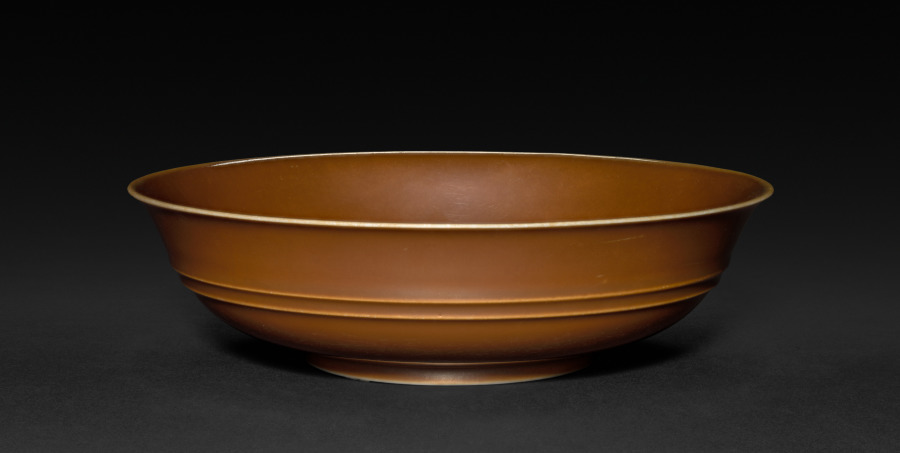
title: Dish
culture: China, Jiangxi province, Jingdezhen kilns, Qing dynasty (1644-1911), Yongzheng mark and reign (1723-35)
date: 1723–35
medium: porcelain with café-au-lait glaze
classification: Ceramic